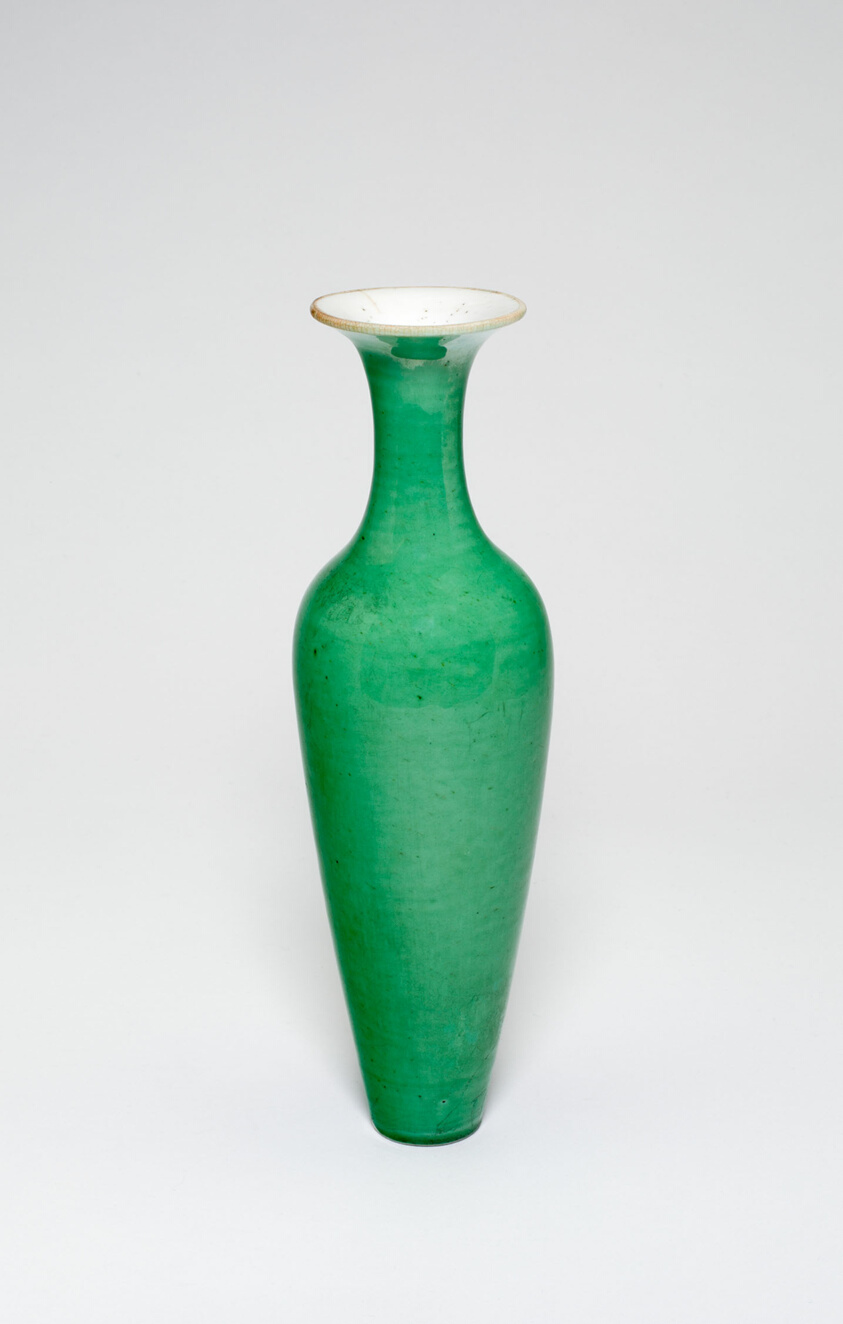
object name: Vessel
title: Amphora-Shaped Vase (Liuyeping)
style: Chinese (culture or style)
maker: China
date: Qing dynasty (1644–1911), Kangxi reign mark and period (1662–1722)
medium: Porcelain with green crackled glaze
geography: China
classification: vase; vessel; porcelain; asian art; ceramics